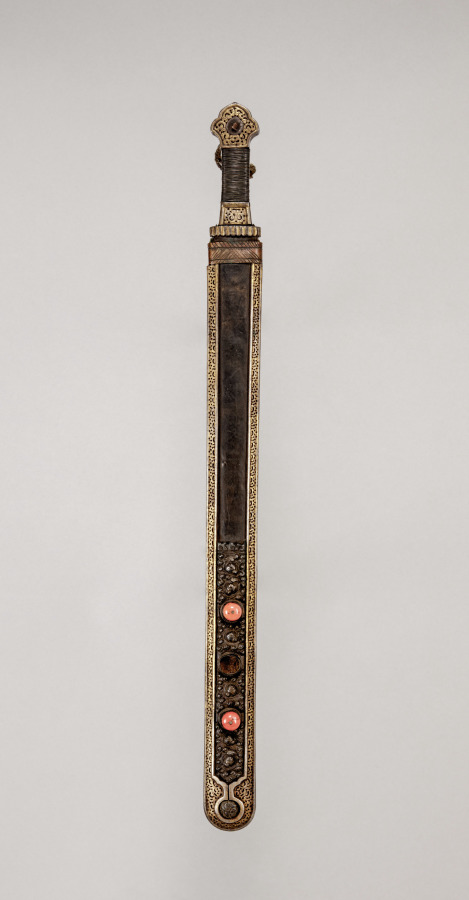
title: Sword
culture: India, Bhutan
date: 1800s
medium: iron with gilt and leather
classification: Arms and Armor